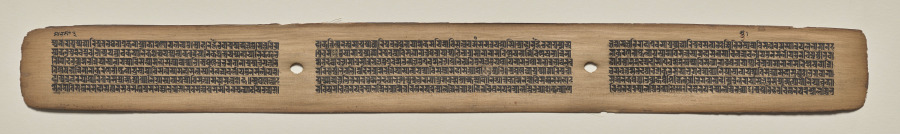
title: Text, Folio 113 (recto), from a Manuscript of the Perfection of Wisdom in Eight Thousand Lines (Ashtasahasrika Prajnaparamita-sutra)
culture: Eastern India, Bihar, Vikramashila Monastery. Painting: Nepal, Kathmandu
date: Sunday, September 14, 1119 (year 239 of the Newar Samvat in the month of Ashvina)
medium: gum tempera and ink on palm leaves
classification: Painting